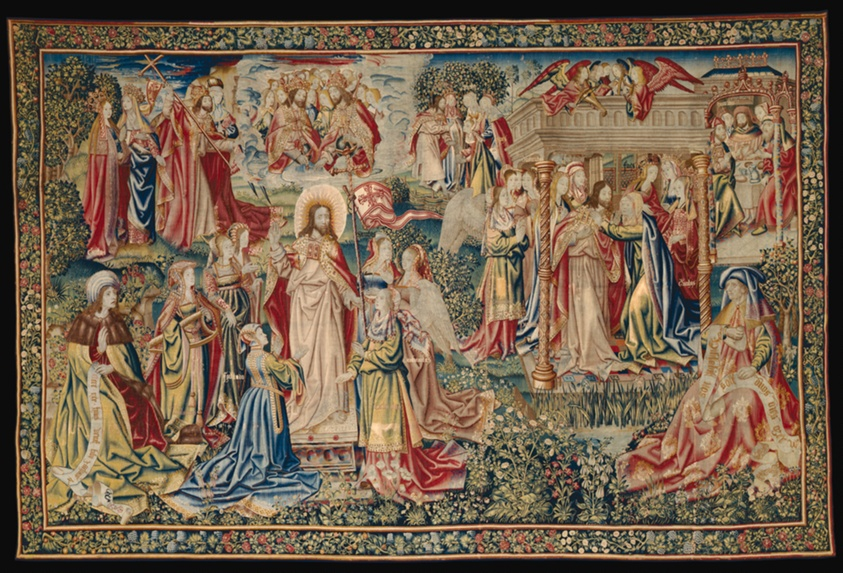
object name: Textile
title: The Resurrection from The Allegory of the Redemption of Man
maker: Southern Netherlands, possibly Brussels; After a design by an unknown artist, c. 1500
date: c. 1500/10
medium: Wool and silk; slit, dovetailed, and double interlocking tapestry weave. Warp: Count: 7 warps per cm; wool: S-ply of three Z-spun elements; diameters: 0.7–1.0 mm Weft: Count: varies from 22 to 34 wefts per cm; wool : S-ply of two Z-spun elements; diameters: 0.3–1.0 mm; silk: S-ply of two Z-twisted elements; pairs of S-ply of two Z-twisted elements; diameters: 0.3–1.1 mm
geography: Flanders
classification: weaving - tapestry; textile